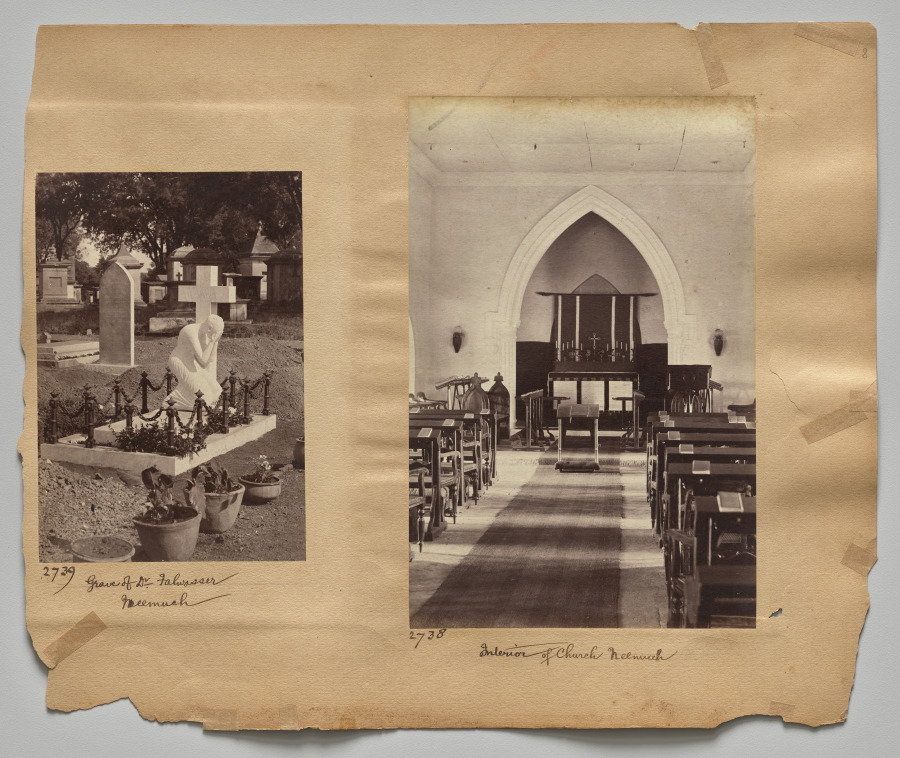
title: Interior of Church, Neemuch (recto, right); Grave of Dr. Falwasser, Neemuch (recto, left); Indian Lady 250 BC (verso, right)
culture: India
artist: Raja Deen Dayal (Indian, 1844–1905)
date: c. 1882–87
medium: albumen print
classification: Photograph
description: These photographs are part of an album, now disassembled, of around 105 photographs taken in India between 1885 and summer 1887 that provide glimpses into the lives of the British colonial elite and royal and upper-class Indians. The museum holds another group of 37 pictures from this album (2016.266), which was probably commissioned by a British civil servant visiting or working in India around 1888 as a personal souvenir of his experiences there.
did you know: Raja Deen Dayal is regarded now, and was considered during his lifetime, to be India’s most important 19th-century photographer.